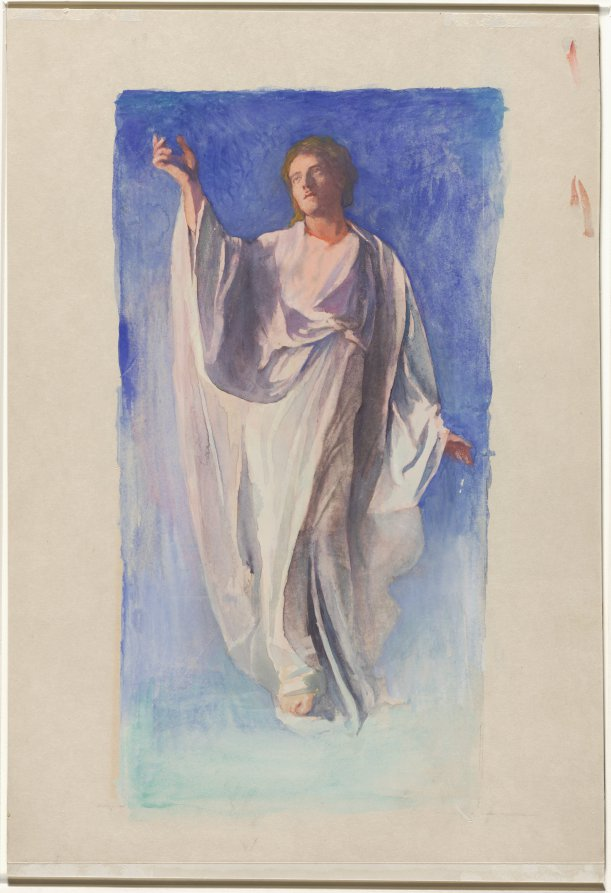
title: The Resurrection of Christ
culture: America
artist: John La Farge (American, 1835–1910)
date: c. 1902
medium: watercolor and gouache; partial framing lines in graphite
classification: Drawing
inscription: lower left, in graphite: 7 1/2 x 14 3/4 [sideways]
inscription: verso, secondary support, center, in graphite: 9999 [underlined]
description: This watercolor is a study for the figure of Christ in a stained glass window La Farge designed for the west wall of the north transept of Trinity Church in Boston.